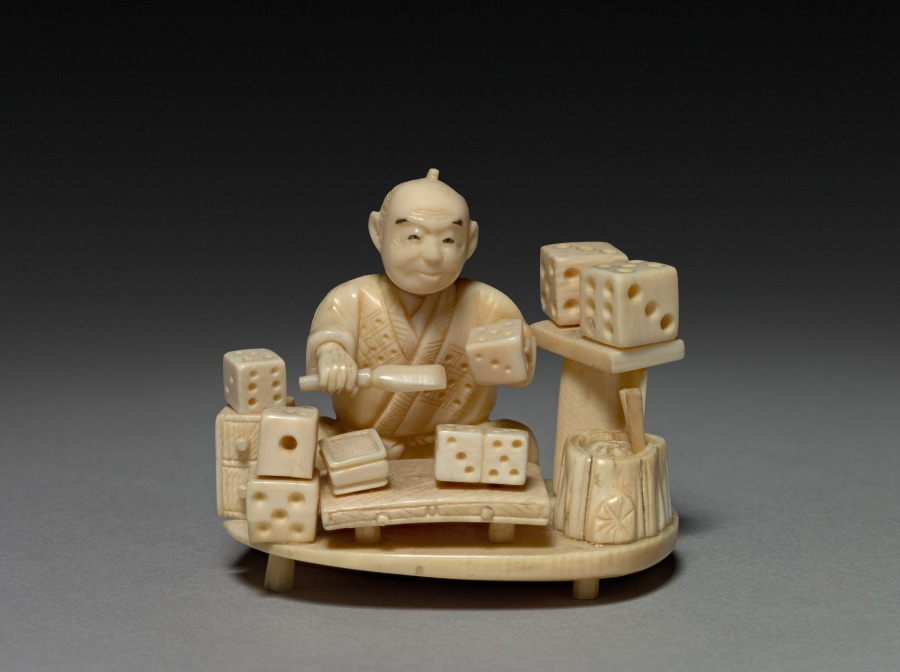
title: Man with Dice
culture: Japan, Edo period (1615–1868) to Meiji period (1868–1912)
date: 1800s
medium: ivory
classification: Netsuke